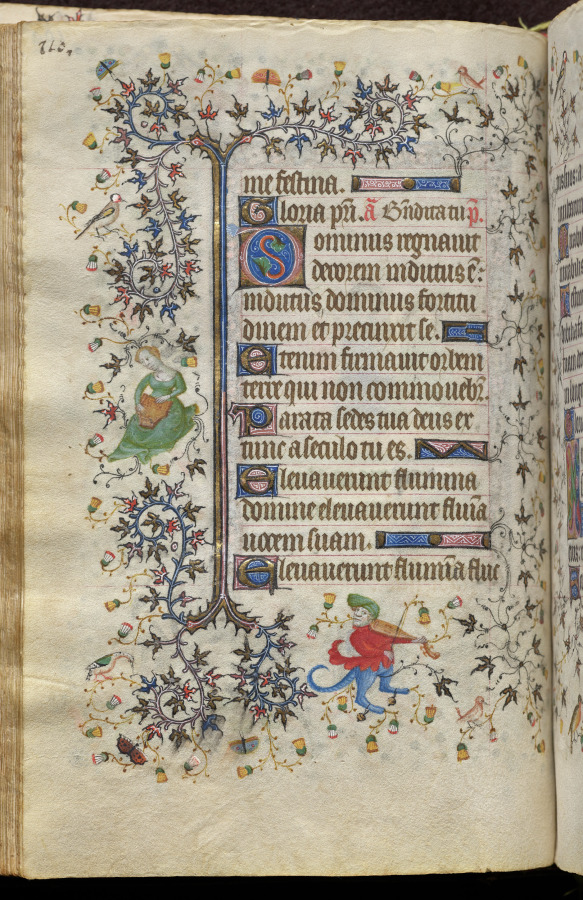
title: Hours of Charles the Noble, King of Navarre (1361-1425): fol. 55v, Text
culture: France, Paris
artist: Master of the Brussels Initials and Associates (French)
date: c. 1405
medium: ink, tempera, and gold on vellum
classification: Bound Volume